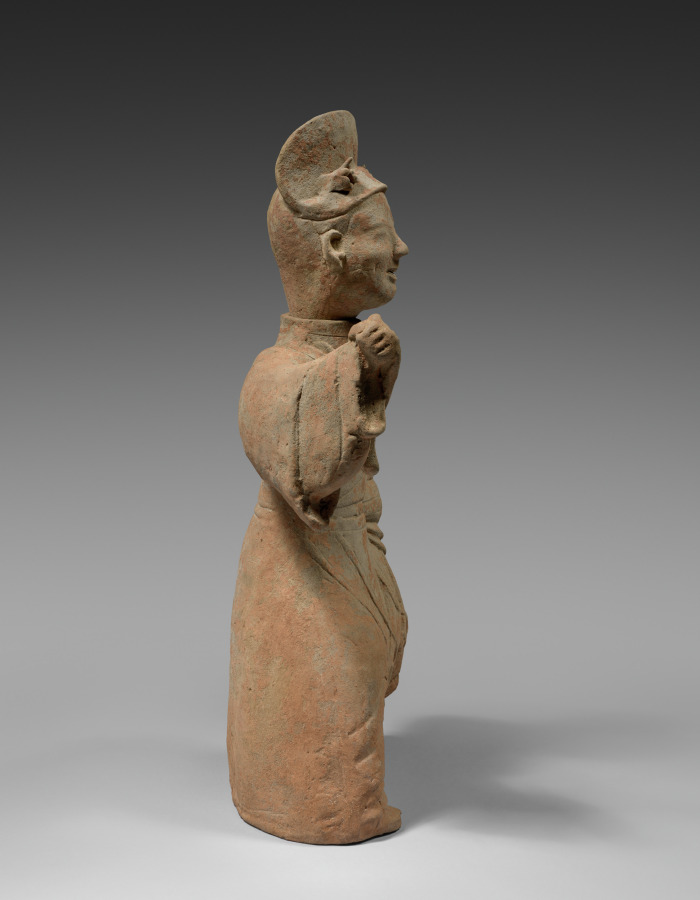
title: Female Figure of a Court Entertainer Dancing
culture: China, Sichuan province, Eastern Han dynasty (25–220 CE)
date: 100s CE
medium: Pottery with traces of color pigment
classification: Ceramic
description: During the Han era, tombs of the elite were provided with sculpted renditions of their earthly entourage, such as guardians or musicians, to signify their status in the afterlife. The female dancer with elaborate hairdo held by flower ornaments raises one arm holding her wide sleeve with one hand, while the other lifts her robe to reveal what appears to be a drum underneath her garment, her face smiling, all in a gesture of an entertainer.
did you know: The dancer lifts her robe to reveal what appears to be a drum underneath her garment.